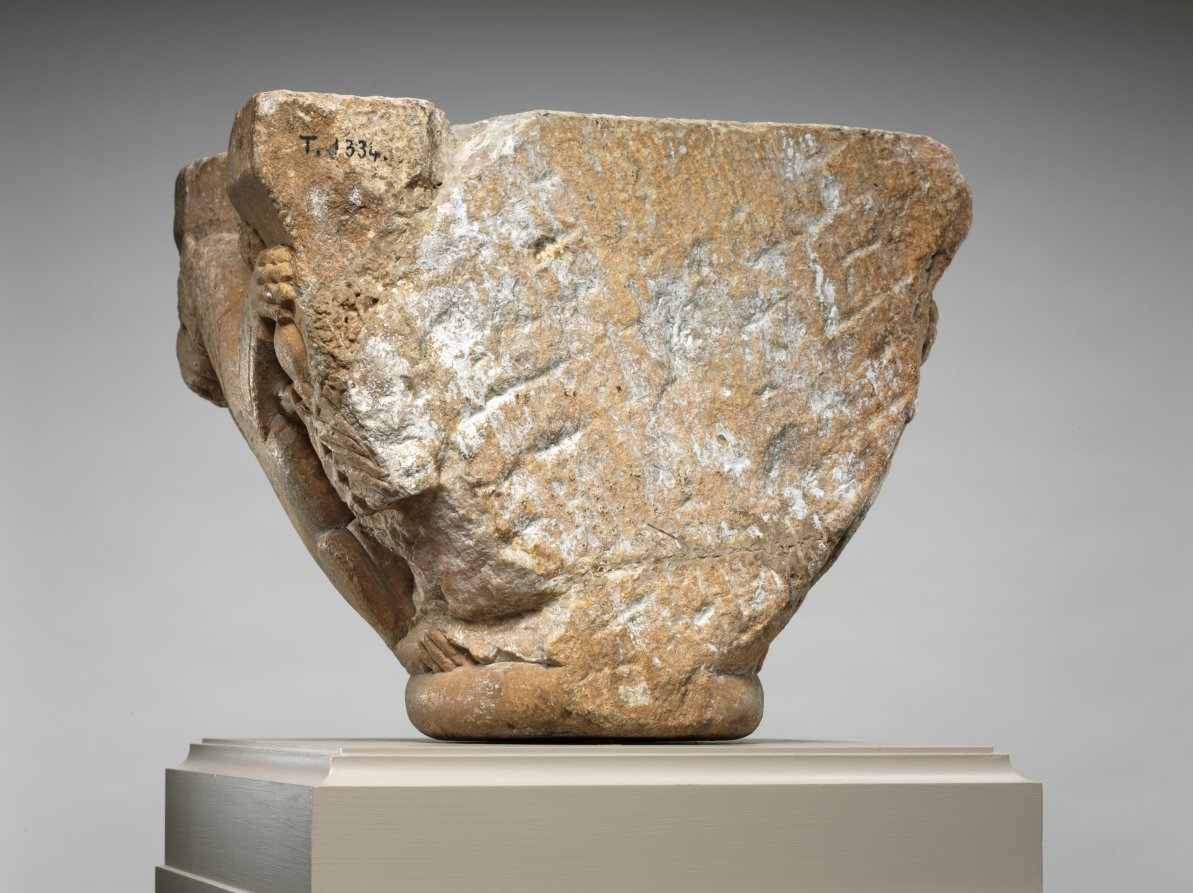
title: Engaged Capital with Lions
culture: Northern Spain (Navarre ?) or Southwest France (Pyrénées or Roussillon ?), mid-12th century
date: 1145–64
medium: marble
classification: Sculpture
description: The compositional motif of confronted and addorsed beasts illustrated on this capital was especially popular in churches along the pilgrimage roads.